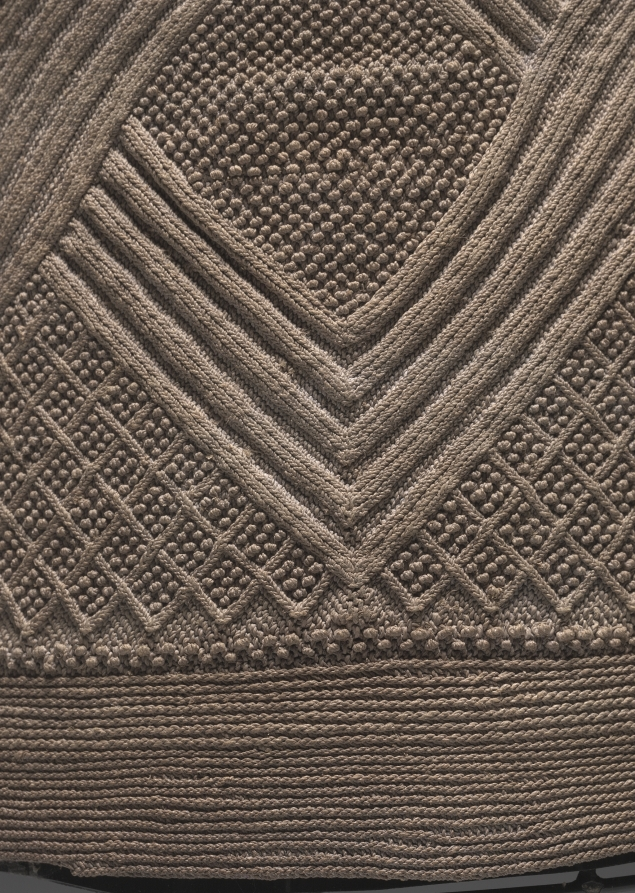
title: Prestige Cap (mpu ngola)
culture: Africa, Central Africa, Democratic Republic of Congo, Republic of Congo, or Cabinda (Angola), Kongo-style maker, possibly Yombe subgroup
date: late 1800s–early 1900s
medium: Raffia palm fiber (Raphia ruffia or R. vinifera) and leopard claws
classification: Garment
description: Zimpu (singular: mpu) are intricately knotted caps worn by men in parts of Central Africa. Ringed with leopard claws, this long cap (mpu ngola) once belonged to a high-status man; the fierce feline attachments alluded to his personal qualities, as both were seen as leaders in their domains. Its interlacing motifs appear across artforms made by the Kongo, Vili, and Yombe peoples. When new, caps draped over the head. However, raffia fibers stiffen over time. To support this now-delicate ngola, the CMA’s conservators mounted it upright. Known since at least 1607 in the former Loango Kingdom, as well as the adjacent Kongo Kingdom, such caps were once made by noblemen and worn into at least the 1980s.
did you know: The geometric motifs on this mpu cap—including diamonds and interlaces—are seen on Kongo, Vili, and Yombe works in other materials, including ivory and basketry.